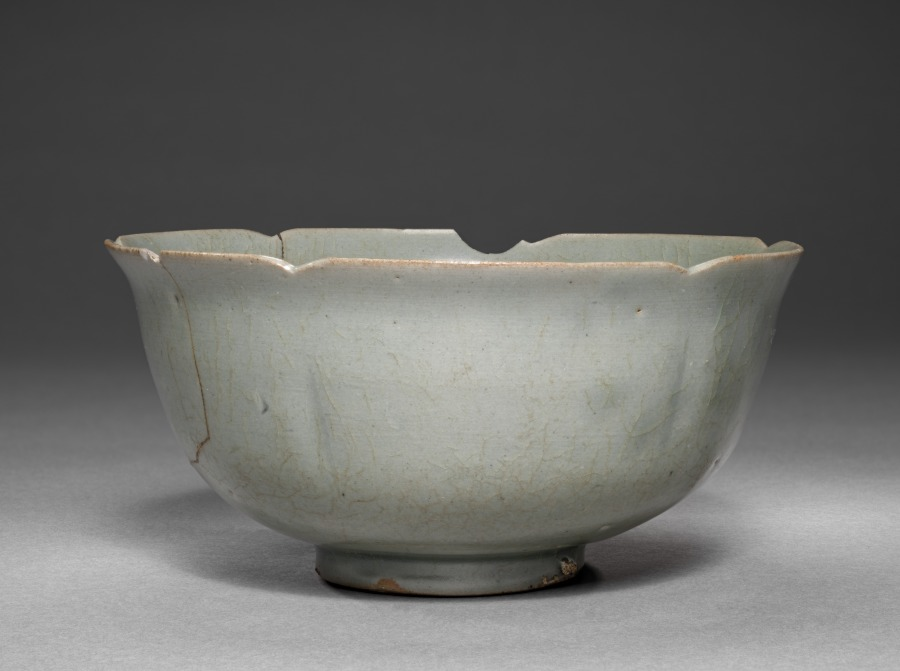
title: Floral-shaped Bowl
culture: Korea, Goryeo dynasty (918–1392)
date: 1100s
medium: Ceramic, glazed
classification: Ceramic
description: Celadons, spoons, seals, and bronze mirrors were the most common burial objects in tombs during the Goryeo period (918–1392). Furnishing tombs with an elaborate assemblage of objects was believed to honor and comfort the newly dead. Generally, Goryeo tombs were left untouched until the late 19th century. During the colonial period (1910–45), however, Japanese archaeologists competitively excavated the tombs located in Kaeseong, the former capital of the Goryeo period. This elegant floral-shaped cup was probably one of those grave goods excavated during the Japanese colonial period.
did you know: Elites of the Goryeo period are known for their love of drinking tea and wine. This type of delicate-looking cup not only made their drinking experience more enjoyable, but also showed their refined taste.